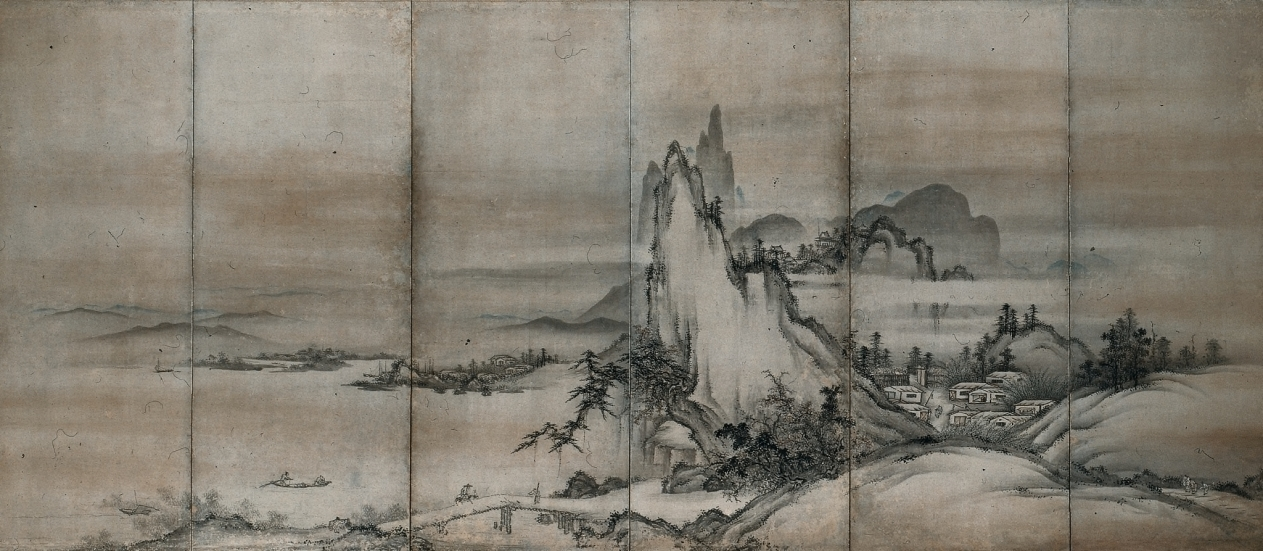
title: Chinese Landscape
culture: Japan, Muromachi period (1392–1573)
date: 1500s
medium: One of a pair of six-fold screens; ink and slight color on paper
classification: Painting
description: In a panorama of mountains and expanses of water, three gentlemen have assembled by moonlight to enjoy one another’s company away from a bustling village. An influx of ink paintings from China in both album and scroll formats beginning in the late 1200s inspired Japanese artists to create landscapes based upon Chinese prototypes. Later, Japanese painters adapted the imagery to the larger format of folding screens, which were used to define spaces in large rooms.